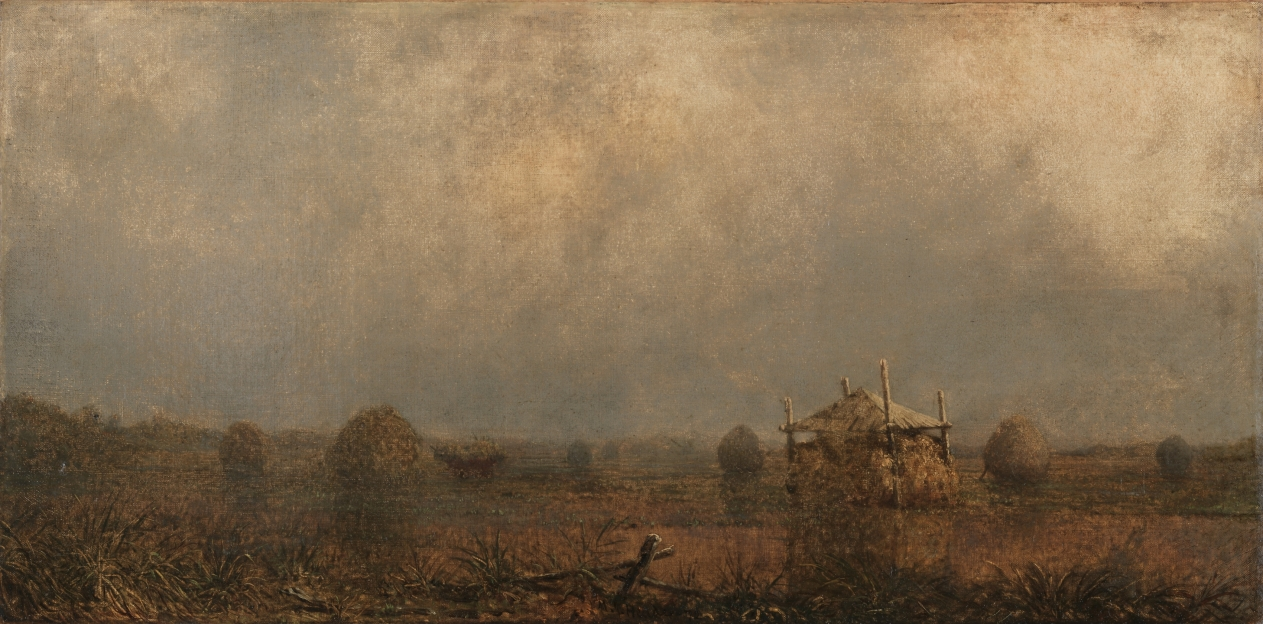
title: High Tide on the Marshes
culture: America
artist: Martin Johnson Heade (American, 1819–1904)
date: 1872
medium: oil on canvas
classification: Painting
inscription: signed lower center: M.J. Heade - 72.